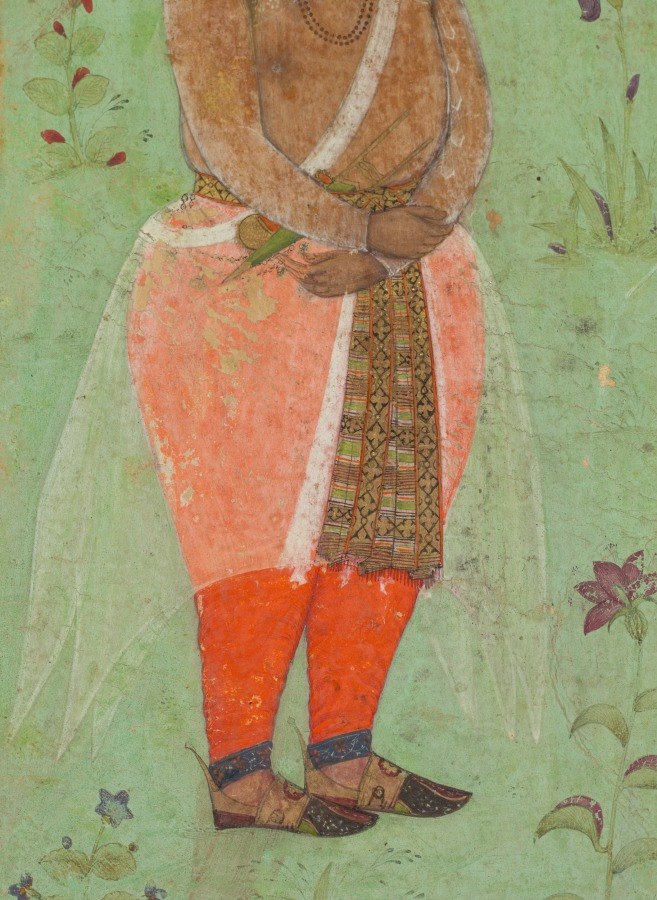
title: Portrait of Suraj Singh Rathor, Raja of Marwar and Maternal Uncle of Shah Jahan: A Page from the Prince Khurram Album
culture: India, Mughal court, early 17th century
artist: attributed to Bishandas (Indian, active c. 1610–30)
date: c. 1600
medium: Gum tempera and gold on paper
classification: Painting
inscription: inscribed in hand of Shah Jahan in lower inner border: shabihi Raja Suraj-Singh Rathor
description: This true-to-life portrait depicts the maternal uncle of the Mughal prince Khurram (1592-1658), who would later become the emperor Shah Jahan. His clothing and accessories-especially the six-pointed wrapped tunic made of prized translucent muslin-reveal his wealth and status. The artist’s skillful brushwork conveys the varied textures of the fabrics and sensitively renders his patient, somewhat weary expression. Prince Khurram selected this painting for inclusion in an album he assembled in 1612. Suraj Singh was a Hindu prince from Marwar, a Rajput kingdom under the auspices of the Mughal empire. His sister, a Marwar princess, was the third wife of the Mughal emperor Jahangir. Intermarriage with Hindu families is one example of the ecumenism of the early Mughal emperors, who adhered to a liberal form of Islam. Suraj Singh died of natural causes while on a military campaign with Prince Khurram in the Deccan in 1619.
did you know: Emperor Shah Jahan himself wrote the label inscription under the painting.